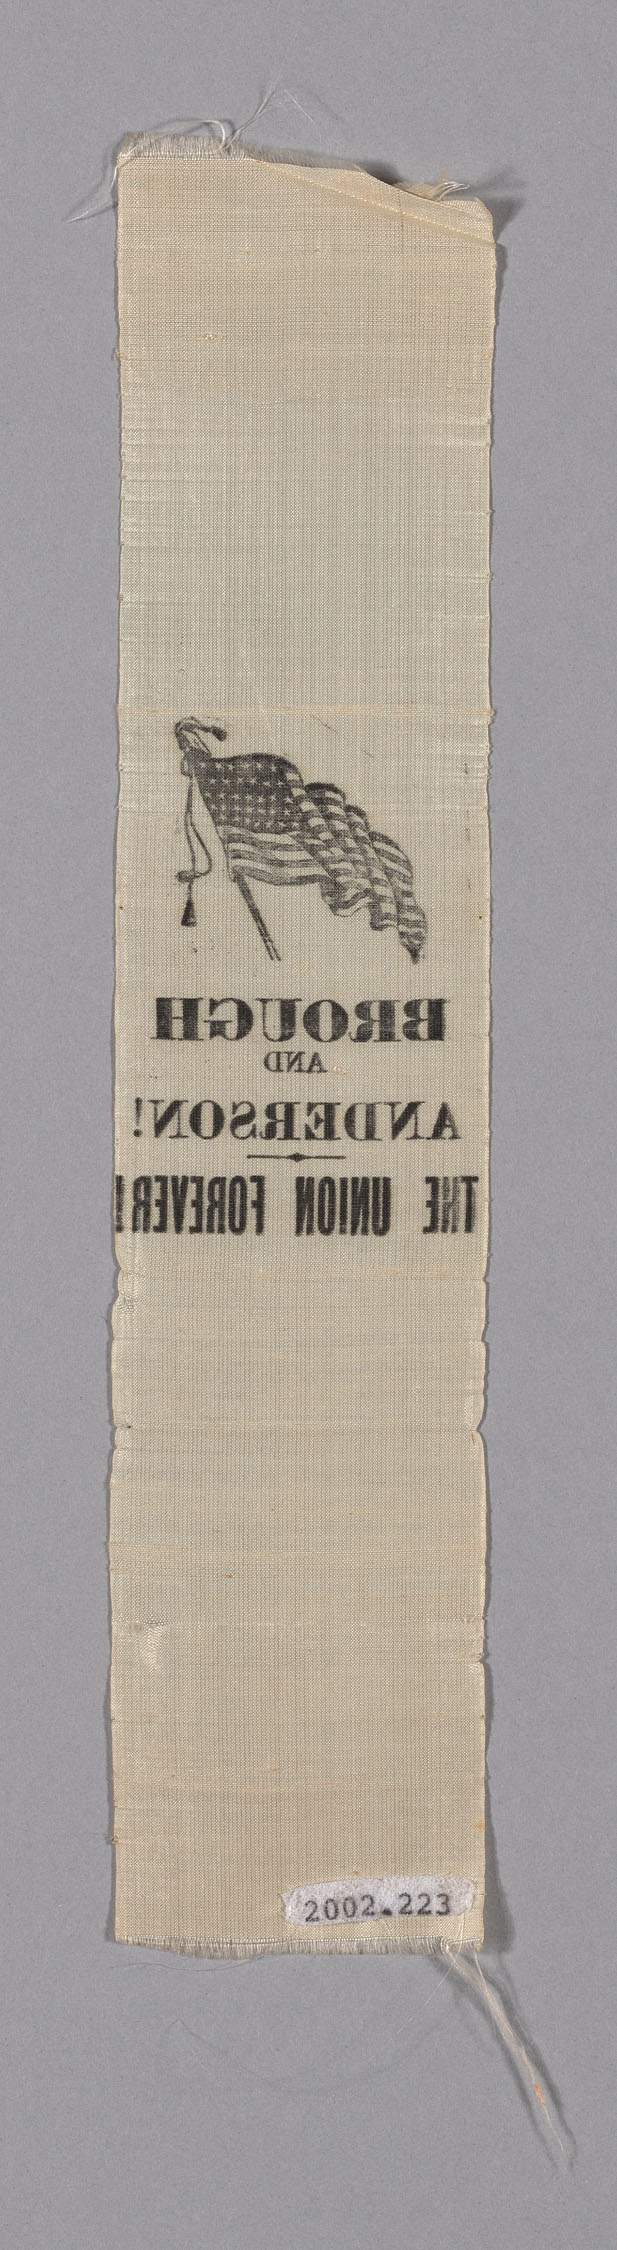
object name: Textile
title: Campaign Ribbon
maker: United States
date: 1863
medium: Silk, plain weave; printed; two selvages present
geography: United States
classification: textile; weaving; weaving - printed